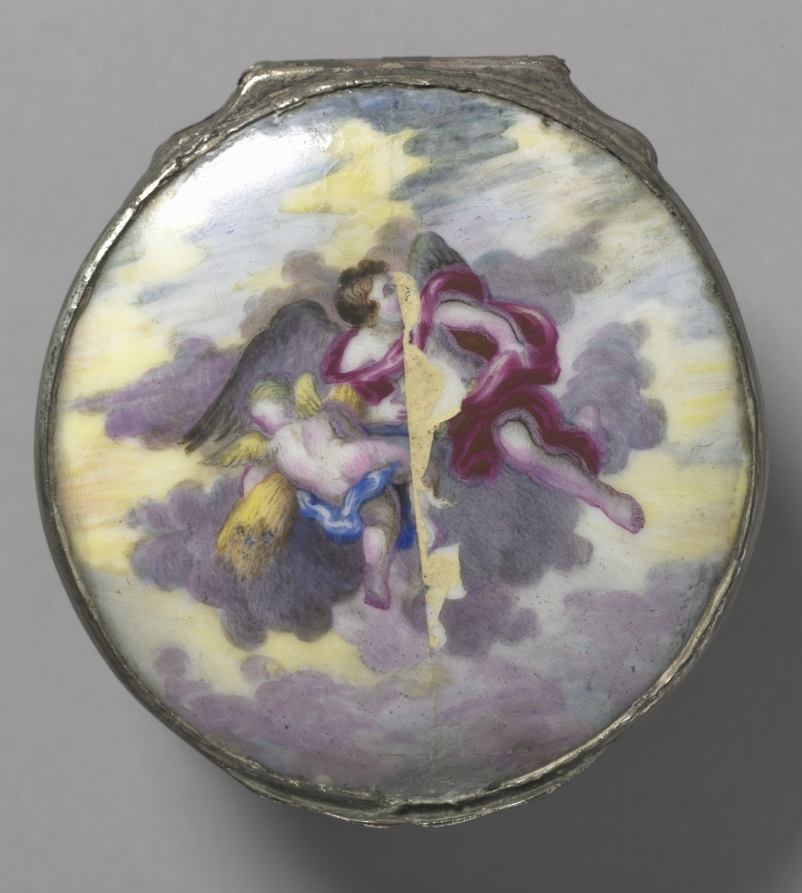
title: Box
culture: Italy or Germany, 18th century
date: 1700s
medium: enamel on copper, metal mounts with traces of gilding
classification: Miscellaneous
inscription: inside box appear the letters "FB" in monogram.